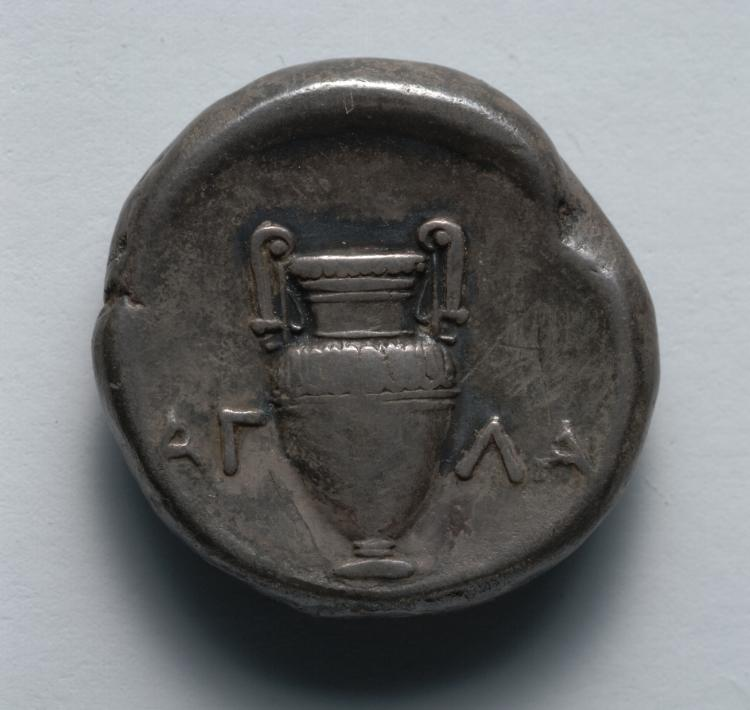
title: Stater: Volute Krater, within incuse circle (reverse)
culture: Greek, minted at Thebes (Boiotia)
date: 379–338 BCE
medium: silver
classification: Coins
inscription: ΑΓ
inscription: ΛΑ